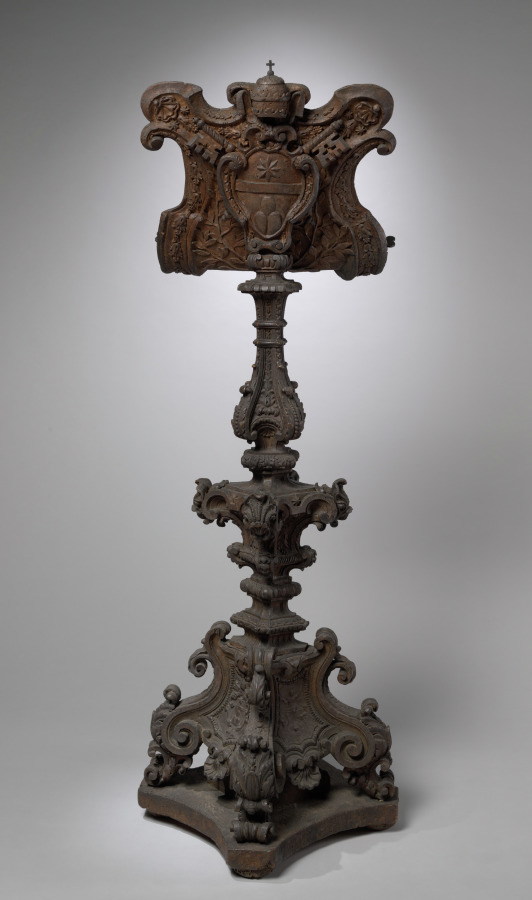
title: Lectern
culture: Italy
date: 1707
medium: wood and gesso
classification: Furniture and woodwork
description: Lecterns of this type were used in Roman Catholic churches and monastery chapels to hold the Bible, from which a priest would read the lessons of scripture and at some points during the liturgy, guide the participants in prayer. The high degree of decoration was achieved by applying plaster gesso to the wooden base allowing for elaborate carving in the same way that a picture frame is worked. Sometimes lecterns bearing the arms of a pope or cardinal like this one were gifts to mark the visit or favor of that official.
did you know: The carved coat of arms on the lectern desk are those of Pope Clement XI, who reigned from 1700 to 1721.